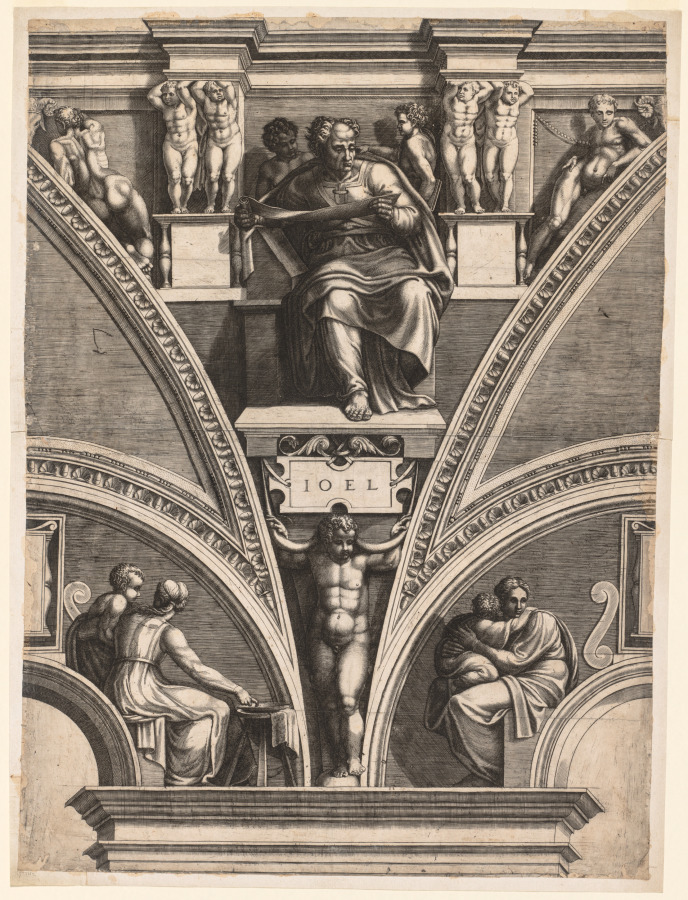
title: The Prophet Joel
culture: Italy, 16th century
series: Six Prophets and Sibyls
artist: Giorgio Ghisi (Italian, 1520–1582)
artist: after Michelangelo Buonarroti (Italian, 1475–1564)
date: early 1570s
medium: engraving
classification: Print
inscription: center, in plate: IOEL ; VERSO, upper center, in graphite: Lot 56[on paper strip glued to edge]/ No 7[?] ; upper right, in graphite: 31 ; lower left, in graphite: 23661 ; lower center, in graphite: Lot[on paper strip glued to edge] ; lower right, in graphite: L. a L. 44ii (of v)[on paper strip glued to edge ; lower right, in graphite: 121688.50 Joel[on paper strip glued to edge] ; lower right, in graphite: B. 18 I/2[on paper strip glued to edge]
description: During the 1500s Michelangelo’s Sistine Chapel ceiling was rarely open to the public and thus for the most part inaccessible. Artists, however, were generally allowed to visit the chapel to study and make drawings from the paintings. Giorgio Ghisi did so in the 1540s and created engravings of six of the chapel’s prophets and sybils. His Prophet Joel accurately reproduces the pose, costume elements, and architectural detail of the figure in a voluminous engraving technique, with dramatic darks and lights that evoke the three-dimensional forms of sculpture. Engravings such as this spread Michelangelo’s inventions throughout Europe, but in pieces: one still had to visit the chapel to see the whole composition.